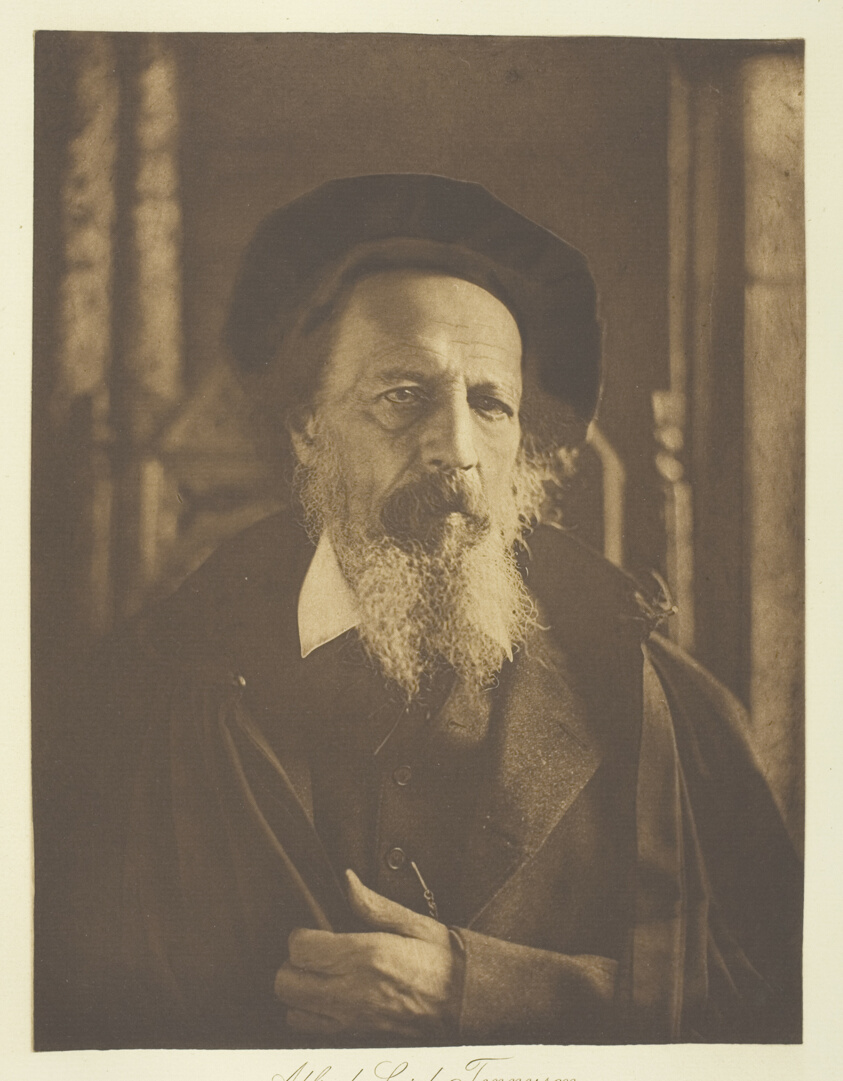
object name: Photograph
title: Alfred, Lord Tennyson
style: 19th century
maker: Henry Herschel Hay Cameron (English, 1852–1911)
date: 1888, printed c. 1893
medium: Photogravure, plate 5 from the album "Lord Tennyson and his Friends" (1893)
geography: England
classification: photogravure; photomechanical process; photography; photograph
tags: Collected by Hugh Edwards, Lord Tennyson and His Friends